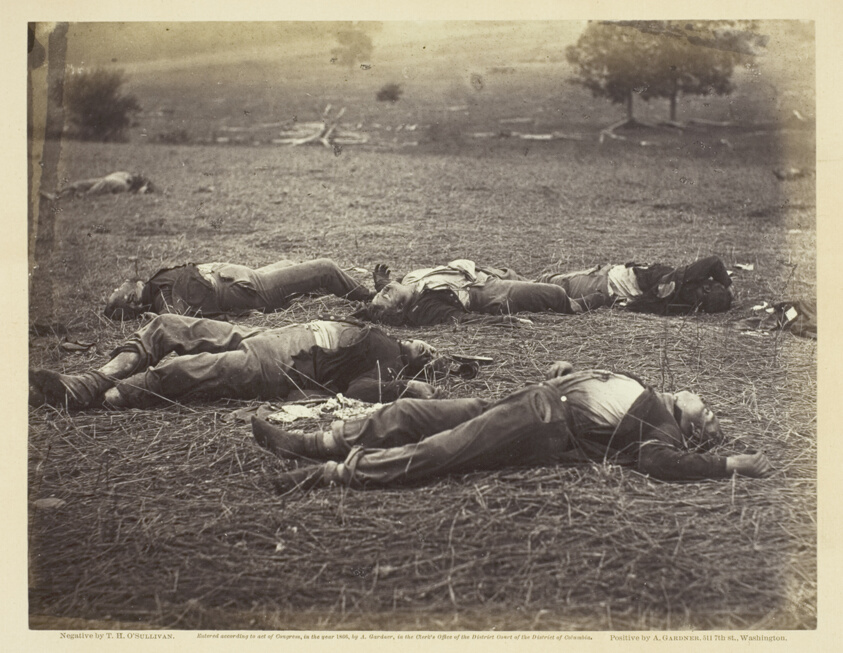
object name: Photograph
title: Field Where General Reynolds Fell, Gettysburg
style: 19th century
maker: Timothy O'Sullivan (American, born Ireland, 1840–1882)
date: July 1863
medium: Albumen print, pl. 37 from the album "Gardner's Photographic Sketch Book of the War, vol. 1" (1866)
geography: United States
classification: photograph; albumen silver print; photography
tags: Collected by Hugh Edwards, Gardner's Photographic Sketch Book